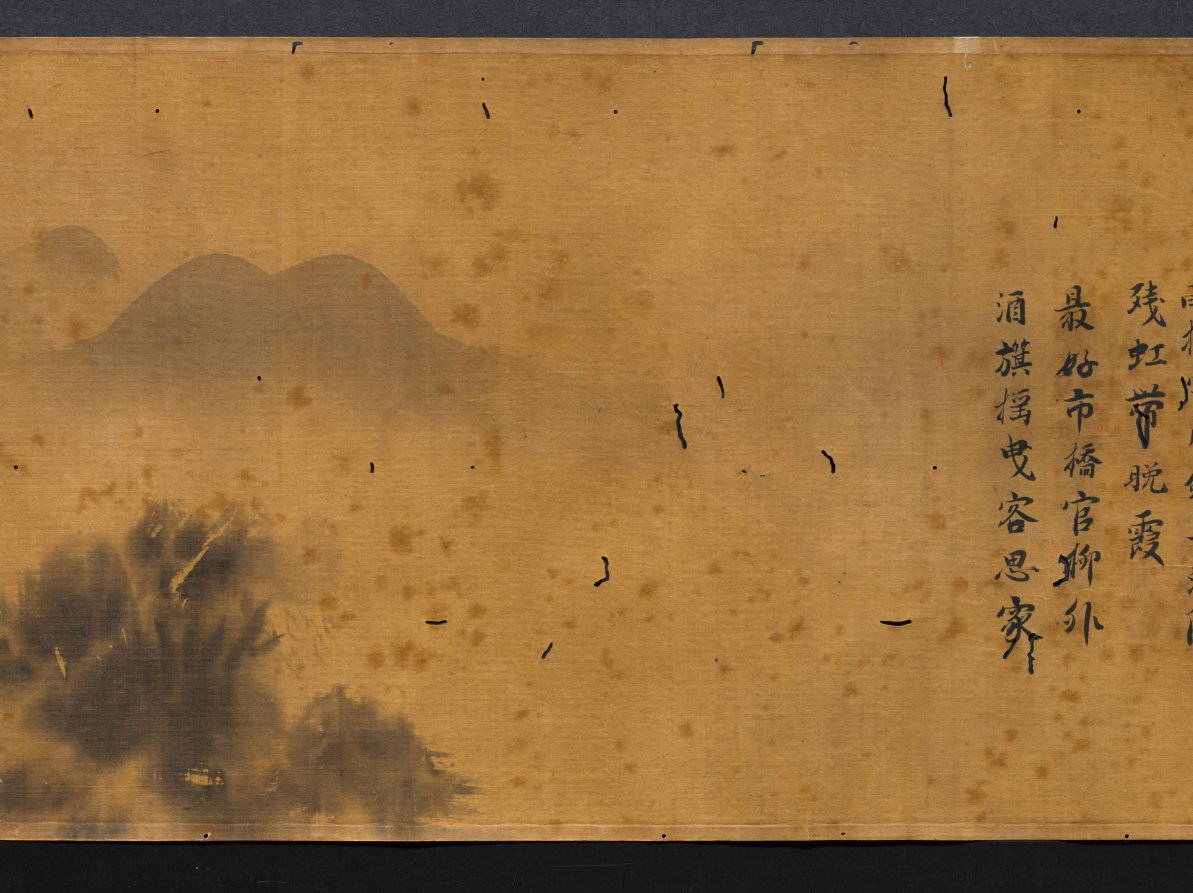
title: Eight Views of Xiao-Xiang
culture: Japan, Edo period (1615–1868)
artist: Kano Tan’yū (Japanese, 1602–1674)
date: 1615–1868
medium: handscroll; ink on silk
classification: Painting